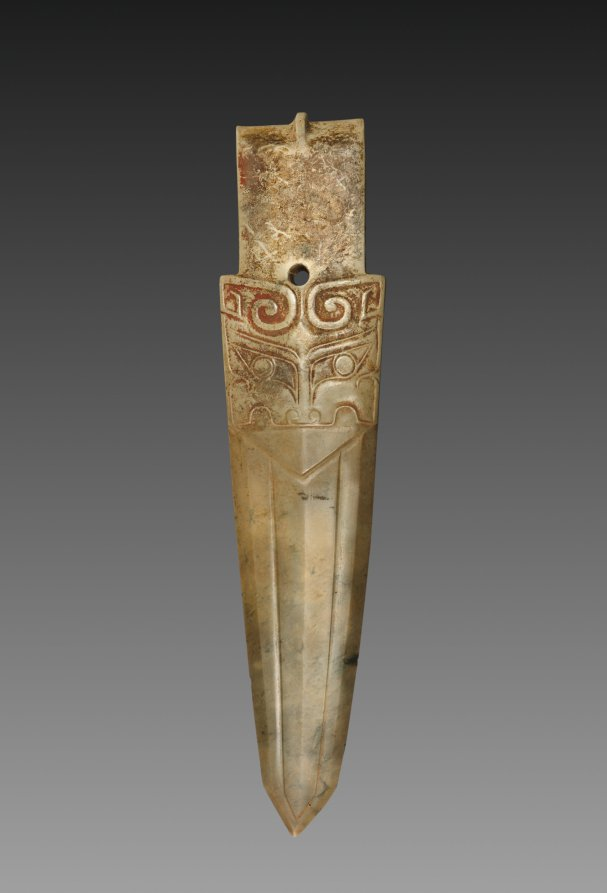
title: Ceremonial Dagger-Axe with Animal Masks (Ge)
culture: China, Shang dynasty (c. 1600–c. 1046 BCE)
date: c. 1600–1050 BCE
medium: jade (nephrite)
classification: Jade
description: Jade is an extremely hard material. In ancient China, it was carved or ground with fine abrasives, such as quartz sand, affixed to cutting or drilling tools. The form of this jade (ge, ceremonial dagger axe), was likely derived from similarly shaped bronze weapons. The pointed and slightly curved blade was symmetrically carved. It seems to emerge from the mouth of the taotie, the animal mask. The taotie’s curved horns were carved in relief bands; its eyes, snout, and upper jaw are delineated in threadlike relief. Similar taotie designs are also seen on bronze vessels of the same period. The hole in the tang indicates where the blade was originally attached to a wooden shaft.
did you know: Traces of vermilion or cinnabar remain on the taotie mask design.